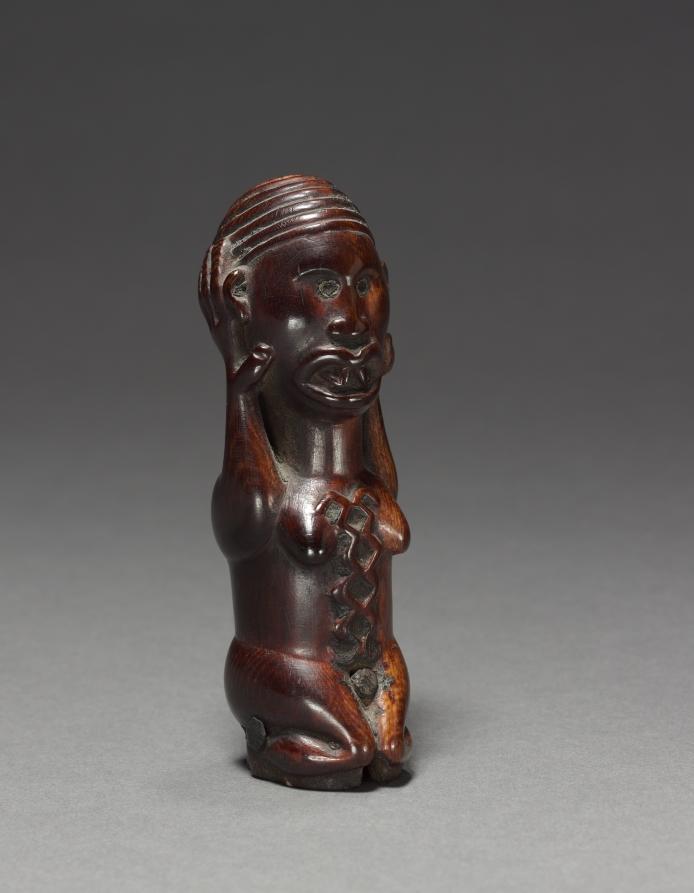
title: Female Figurine or Finial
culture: Central Africa, Democratic Republic of the Congo (most likely), Cabinda, or Republic of the Congo, Kongo people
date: late 1800s-early 1900s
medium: Ivory and iron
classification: Sculpture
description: This ivory figurine most likely served as the finial of a wooden staff or scepter, and owned and used by a high-ranking official or a ritual specialist. The combination of its features is quite unusual. The kneeling attitude is rather common and typically denotes respect. However, the position of the hands is anatomically incorrect with the thumbs toward the face. The idea of the striking hand gesture may refer to mourning.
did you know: The oversized hands with elongated fingers are positioned in an anatomically incorrect manner with the thumbs toward the face.